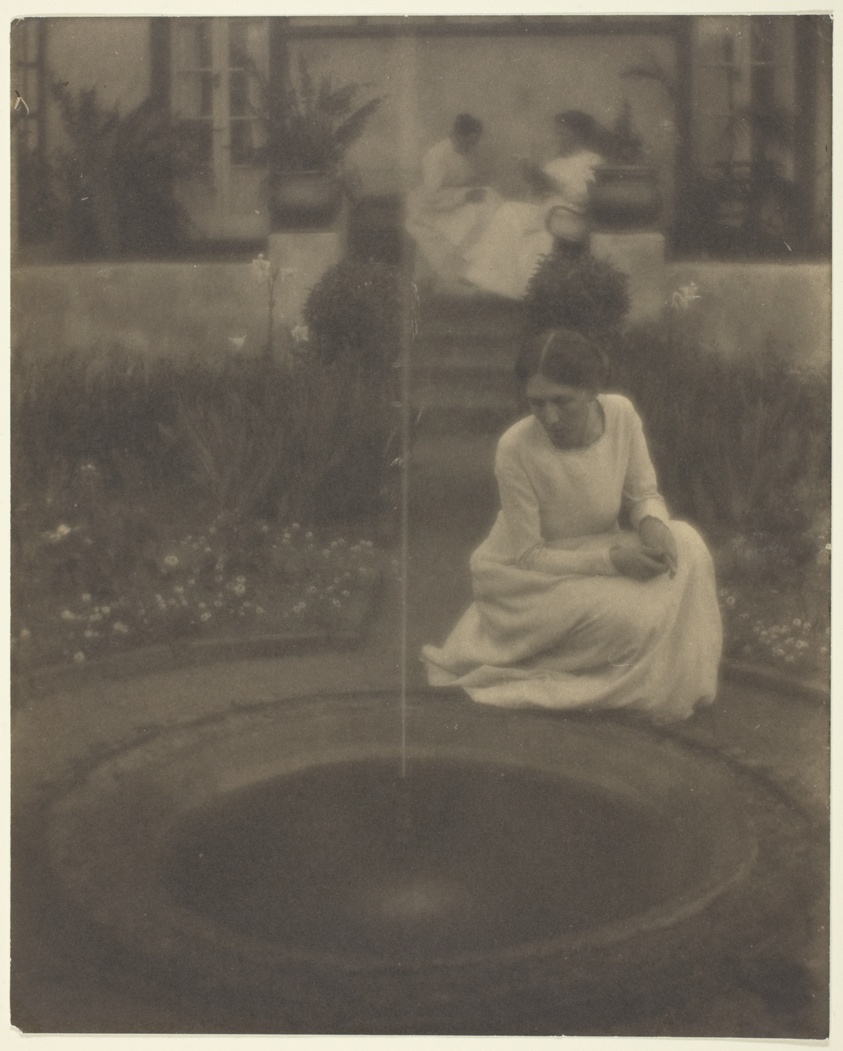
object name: Photograph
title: The Fountain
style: Pictorialism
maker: Clarence H. White (American, 1871–1925)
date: 1905/1906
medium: Platinum print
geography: United States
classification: platinum print; photographic process; photography; photograph